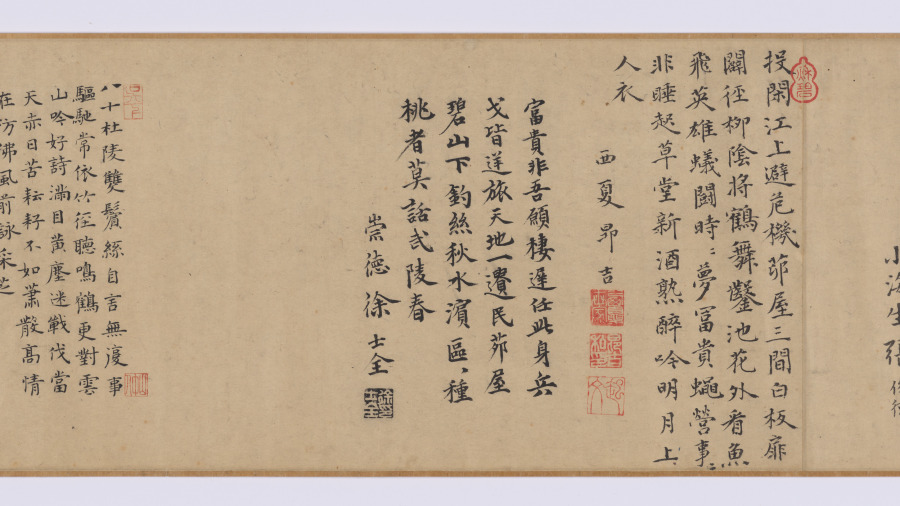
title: Leisure Enough to Spare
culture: China, Yuan dynasty (1271-1368)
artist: Yao Tingmei (Chinese, active mid-1300s)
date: 1360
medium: handscroll, ink on paper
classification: Painting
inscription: 至正廿年春正月_日作此併系鄙語于尾 地偏人遠閉柴關，滿院松陰白晝閒。 眼底風塵渾忘却，坐看流水臥看山。 吳興姚廷美畫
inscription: 23 colophons and 53 seals (dates unavailable for some): 1 colophon, dated 1360, and 2 seals of Yang Weizhen (1296-1370); 1 colophon and 3 seals of Wan Yi; 1 colophon of Zhang Junde; 1 colophon and 3 seals of Angji (act. ca. mid-14th c.); 1 colophon and 1 seal of Xu Shiquan; 1 colophon and 3 seals of Gao Yu; 1 colophon and 2 seals of Li Mingfu; 1 colophon and 2 seals of Lu Lin; 1 colophon and 1 seal of Zhang Qian; 1 colophon of Tao Tangwen; 1 colophon and 1 seal of Wu Yuangui (act. ca. 1300-60); 1 colophon of Bao Jiong; 1 colophon of Wang Zao; 1 colophon and 1 seal of Ma Chuyi; 1 colophon and 1 seal of Lin Yizhuang; 1 colophon and 1 seal of Gu Shunju; 1 colophon and 2 seals of Wang Jing; 1 colophon and 2 seals of Lin Shouchang; 1 colophon and 1 seal of Gao Zhidao; 1 colophon of Lin Xun; 1 colophon, dated 1359, and 2 seals of Meng Weicheng (act. mid-14th c.); 1 colophon and 1 seal of Meng Zhiji (act. mid-l4th c.); 14 seals of Liang Qingbiao 梁清標 (1620-1691); 1 poem dated 1755 and 5 seals of the Qianlong 乾隆 emperor (r. 1736-95); 2 seals of the Jiaqing 嘉慶 emperor (r. 1796-1821); 3 seals of the Xuantong 宣統 emperor (r. 1909-11).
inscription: Title on frontispiece by Zhang Bi 章弼: Signed Gongchen 拱辰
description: Seclusion and leisure—the ideals of the literati, or scholar-gentlemen—are expressed in this mature work by Yao Tingmei. The theme acquired special meaning at a time of the military uprisings near the end of the Yuan dynasty. Dedicated to an ascetic named Du, this work combines painting, calligraphy, and poetry; following the painting are more than 20 poems and essays written by notable scholars, one of whom was the calligrapher Yang Weizhen. It reveals not only the aesthetic taste of the literati but also the practice of contributing artistic and literary works to fulfill social obligations. Yao's painting demonstrates his individual style derived from various ancient masters (Guo Xi, Dong Yuan, and Juran). Yang Weizhen's calligraphy exhibits his bold, vigorous style and his intent to capture the spirit of antiquity in art.